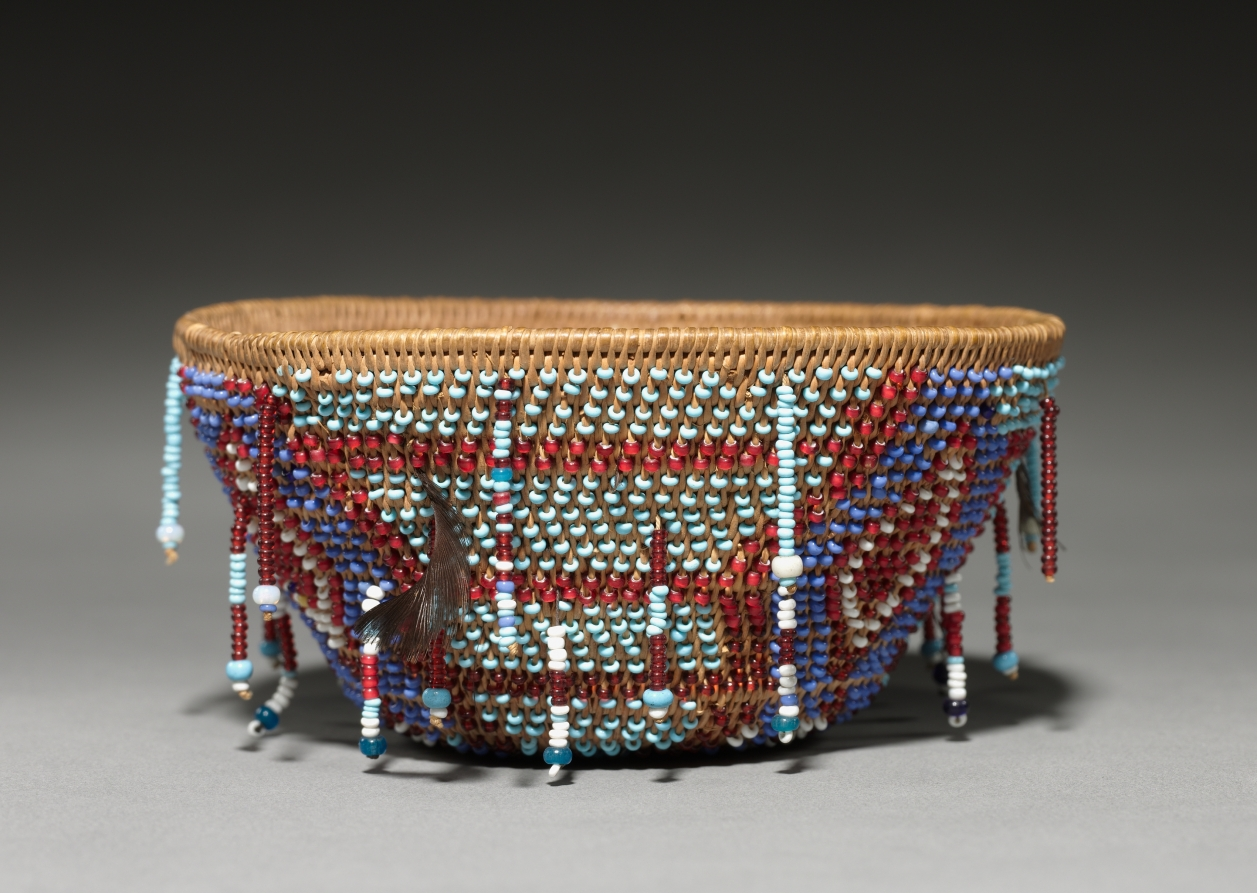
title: Conical Beaded Basket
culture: California, Wappo, Alexander Valley, Late 19th- Early 20th century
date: c. 1875–1925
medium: glass beads and feather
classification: Basketry